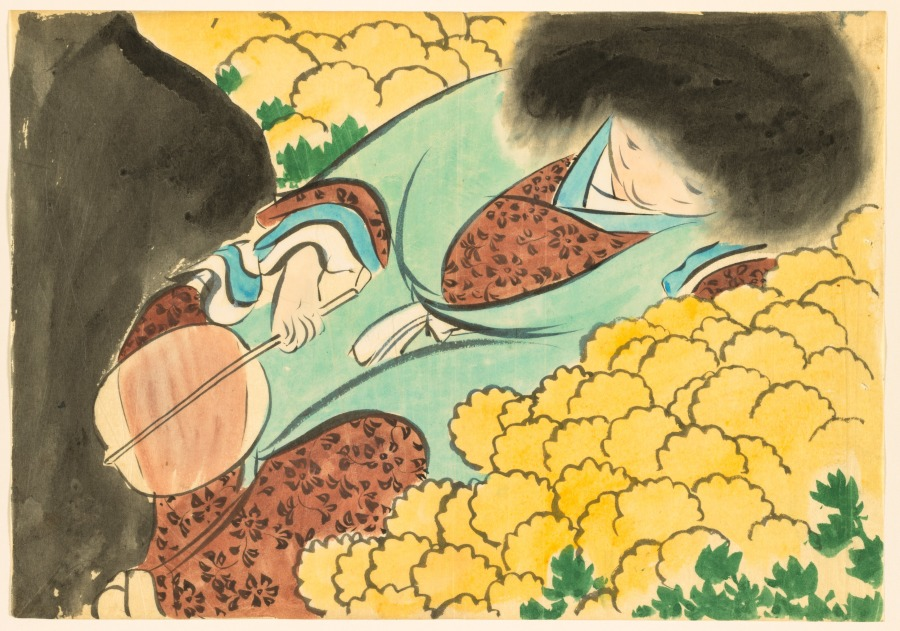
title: Flowers of a Hundred Worlds (Momoyogusa): Chrysanthemum Boy (Kikujidō)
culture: Japan, Meiji period (1868–1912)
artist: Kamisaka Sekka (Japanese, 1866–1942)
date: 1909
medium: ink and color on paper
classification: Drawing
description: Kamisaka Sekka made preparatory drawings for his Flowers of a Hundred Worlds series on tracing paper with ink and color. The freehand sketches are much looser than the finished, printed compositions.